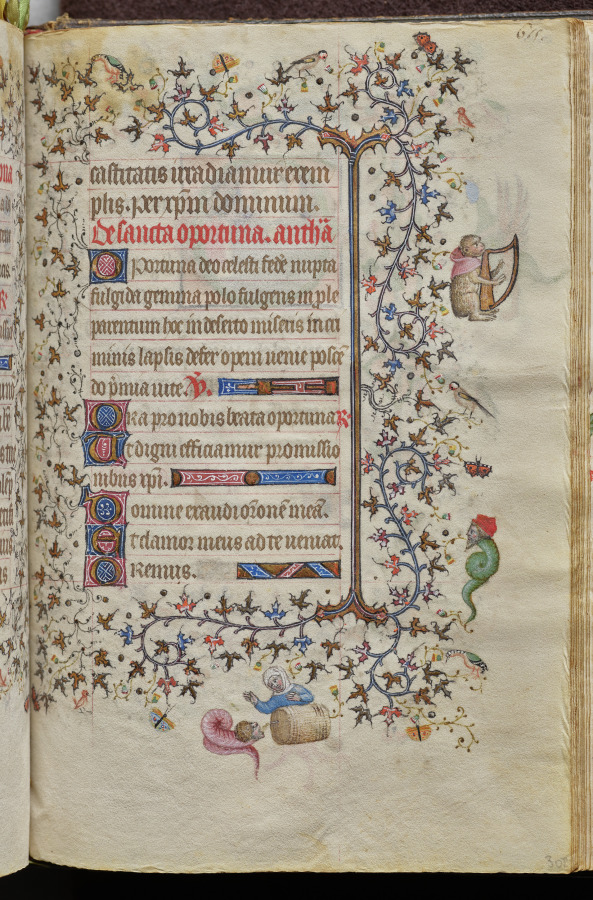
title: Hours of Charles the Noble, King of Navarre (1361-1425): fol. 302r, Text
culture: France, Paris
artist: Master of the Brussels Initials and Associates (French)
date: c. 1405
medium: ink, tempera, and gold on vellum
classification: Bound Volume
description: This precious volume was obviously highly prized by its owner, the French-born King of Navarre, who had his coat of arms painted on no less than twenty folios. Rather than directly commissioning this manuscript from a specific workshop, it seems that Charles the Noble acquired his book of hours -- perhaps ready-made for the luxury market -- while on a trip to Paris in 1404-05. A collaborative effort, six painting styles are evidenced within the pages of this codex, those of two Italians, two Frenchmen, and two Netherlanders. The painter who was responsible for the planning and decoration of the book, and who produced seventeen of the large miniatures, was a Bolognese artist known as the Master of the Brussels Initials. His principal assistant, responsible for most of the borders, was a Florentine who signed his name "Zecho" da Firenze on folio 208 verso.